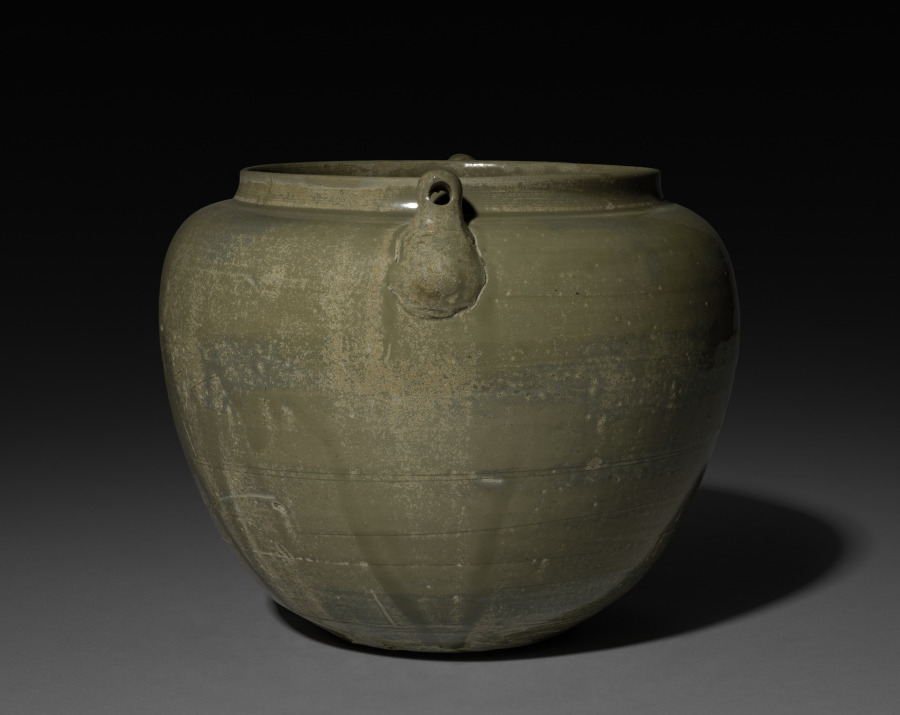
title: Jar with Handles: Yue ware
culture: China, Tang dynasty (618-907)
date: c. 800s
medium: gray stoneware with iron glaze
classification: Ceramic